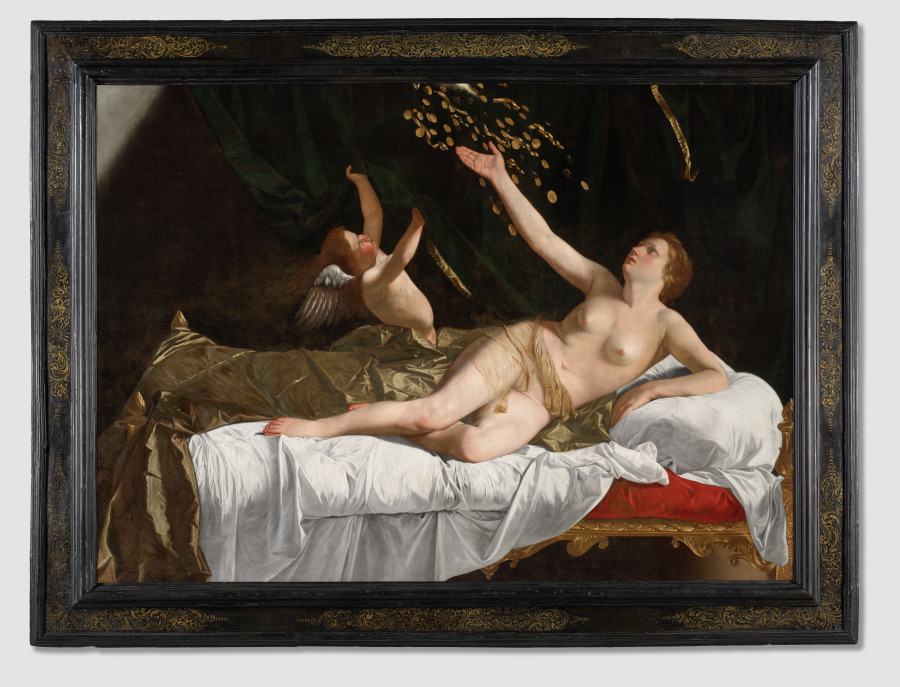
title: Danaë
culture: Italy, 17th century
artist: Orazio Gentileschi (Italian, 1563–1639)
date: c. 1623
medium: oil on canvas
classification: Painting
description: Danaë’s father feared a prophecy that his grandson would kill him, so he imprisoned his daughter to protect her from suitors. Yet Jupiter, king of the gods, fell in love with Danaë, and he came to her in the form of gold streaming from the sky. Gentileschi adopted Caravaggio’s method of painting directly from models, pulled to the front of the picture plane, which gives the painting a startling, tangible quality. However, the graceful way he handled paint and human gestures lends the work a poetic quality unique to the artist.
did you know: The gauzy scarf draped over Danaë was a studio prop present in many of Orazio's paintings.